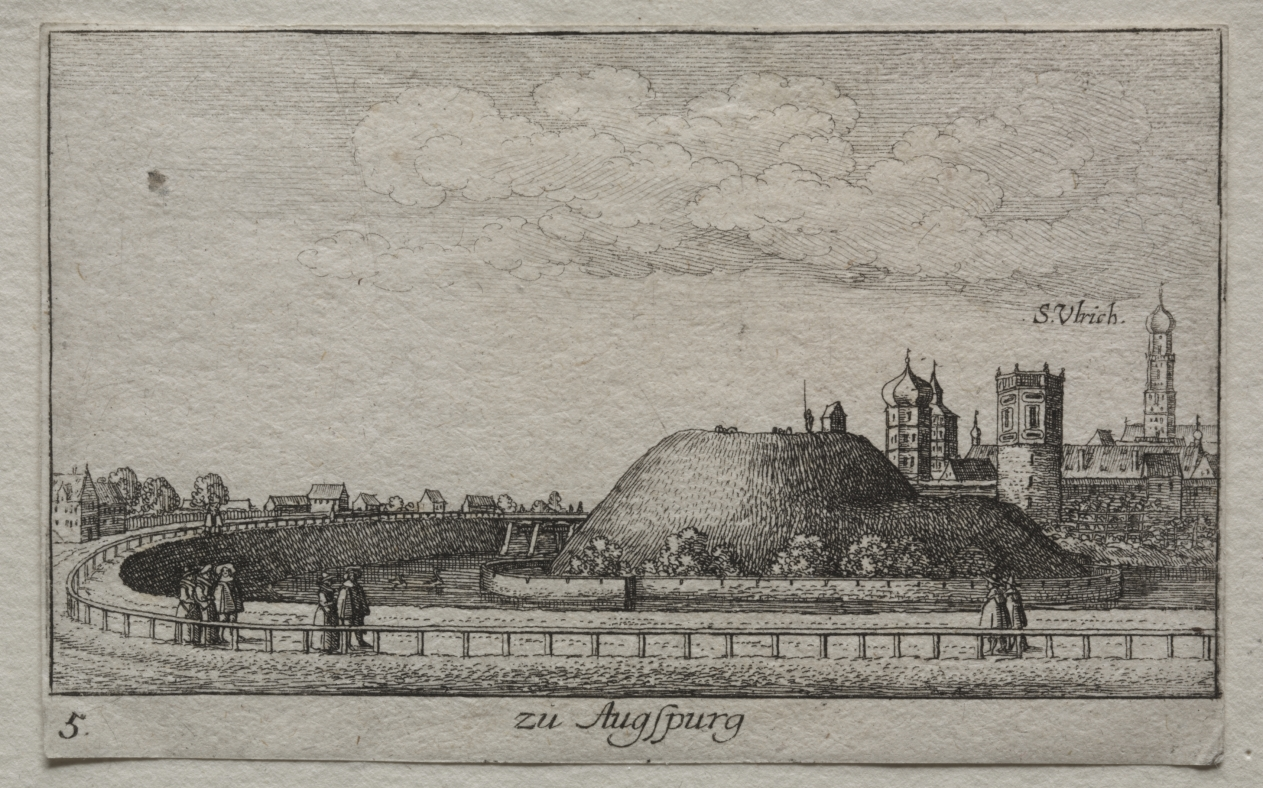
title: Amoenissimae aliquot locorvm...: Plate 5, Augsburg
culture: Bohemia, 17th century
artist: Wenceslaus Hollar (Bohemian, 1607–1677)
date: 1635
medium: etching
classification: Print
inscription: inscribed, lower margin, in plate: 5. zu Augspurg; inscribed, left, within image, in plate: S. Vlrich